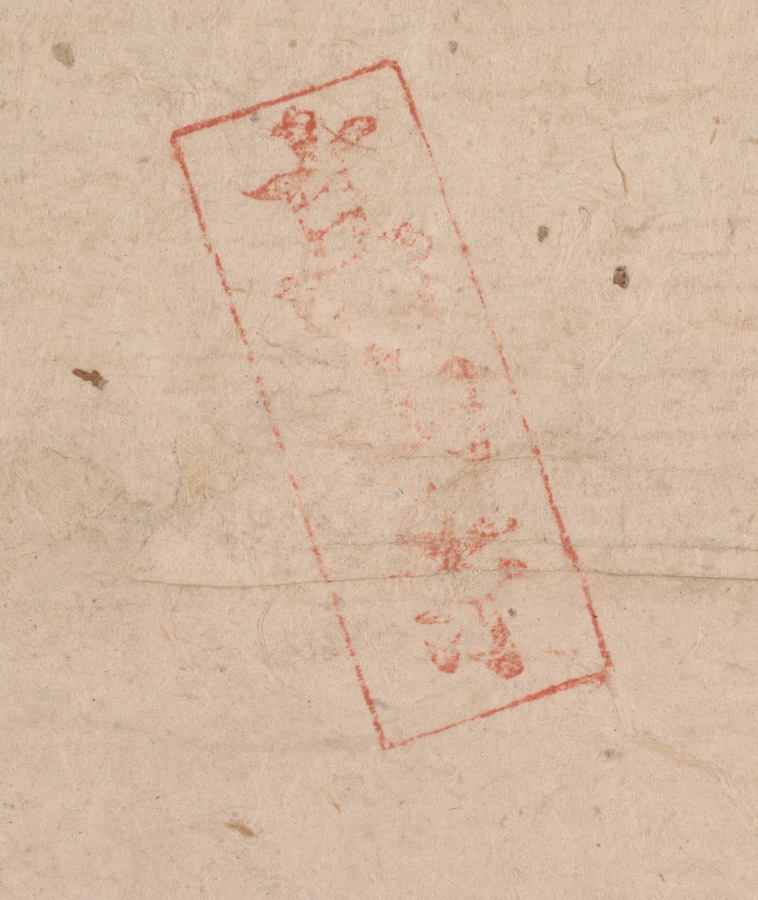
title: White-Robed Kannon (Byakue Kannon)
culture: Japan, Kamakura period (1185–1333)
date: c. 1200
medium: hanging scroll; ink on paper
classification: Painting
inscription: 箱書 石座観音 高山寺舊蔵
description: Kannon is a deity of mercy and compassion in the Buddhist faith. This monochrome sketch comes from Kōzan-ji, a temple in northwest Kyoto. The subdued ink tones and plain brushwork reflect the taste of Zen Buddhism, which began to have an impact on the visual arts in 13th-century Japan.